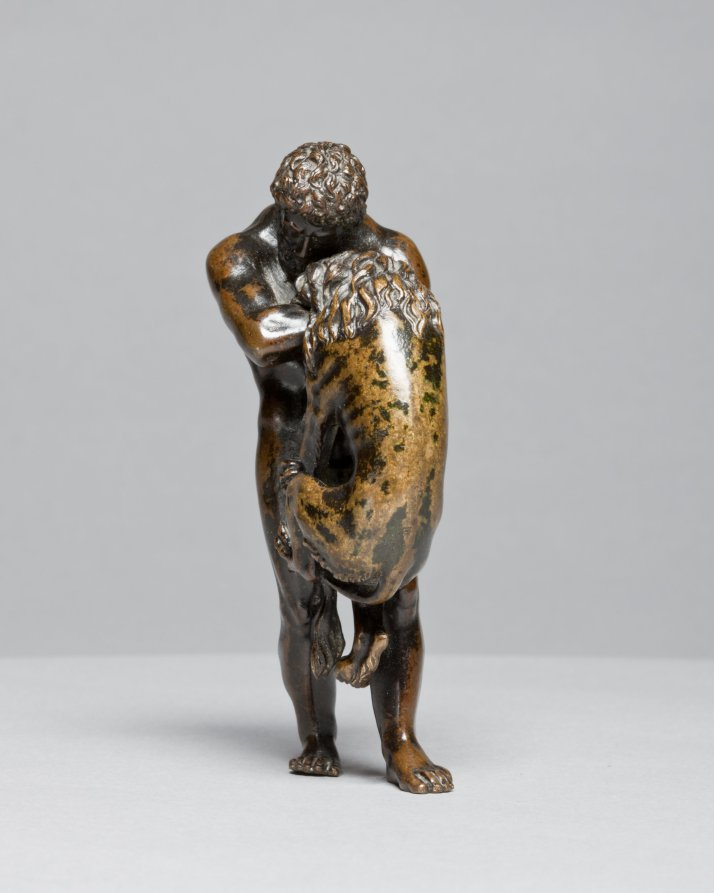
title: Hercules and the Nemean Lion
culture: Italy or France, 16th century or later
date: 1500s or later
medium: bronze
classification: Sculpture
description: The original owner of this work would have understood that this scene referred to the entire story of Hercules, the demi-god who had to accomplish twelve labors. The lion is named after the city of Nemea, near Corinth, a monstrous beast sent by the goddess Hera to wreak havoc on the area. After killing the lion, Hercules wore his pelt, commonly seen in other representations of the hero.